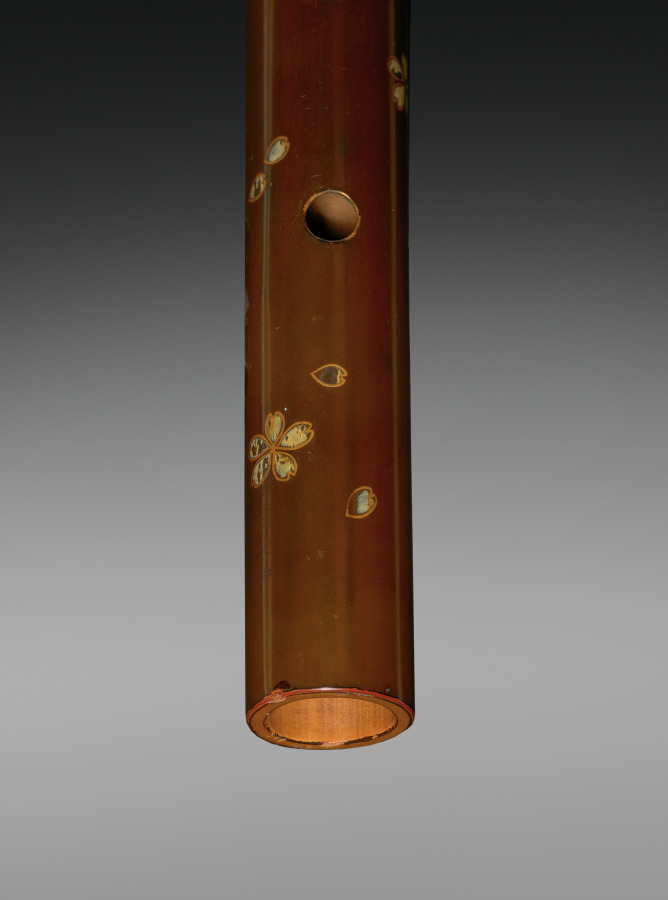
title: End-blown Flute (Hitoyogiri)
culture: Japan, Meiji period (1868–1912)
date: late 1800s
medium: Lacquered bamboo with gold and silver maki-e (sprinkled powder designs)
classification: Musical Instrument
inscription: 篠本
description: The hitoyogiri 一節切 is considered one type of shakuhachi 尺八 bamboo flute and was popular in the 16th and 17th centuries. It is smaller and of weaker sound than the better known fuke 普化, and was thus known as a "small bamboo" or kotake 小竹, during a brief 19th-century revival. The node of the bamboo is positioned between the four finger holes on the front, and the thumb hole at the top of the back. This one has a design of cherry blossoms and scattered petals.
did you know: The name of this flute, hitoyogiri 一節切 comes from the fact that it has a single node in the bamboo from which it is made.